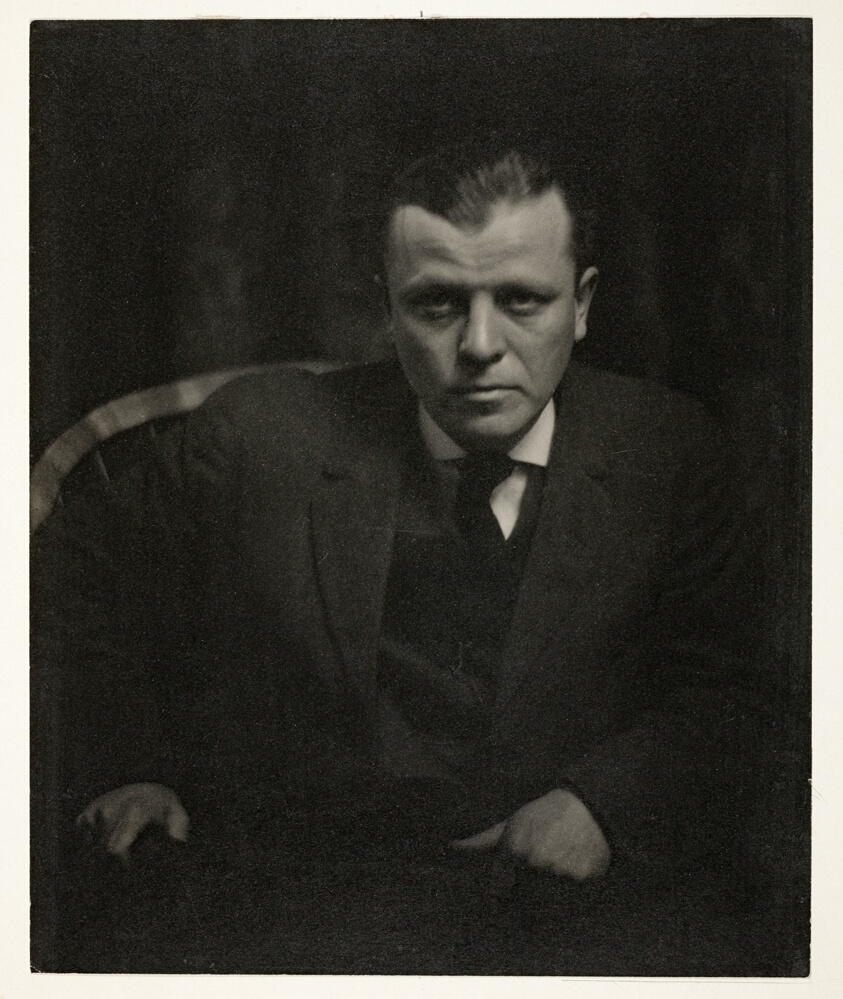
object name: Photograph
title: Arthur G. Dove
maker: Alfred Stieglitz (American, 1864–1946)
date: 1912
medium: Platinum print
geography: United States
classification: platinum print; photographic process; photography; photograph